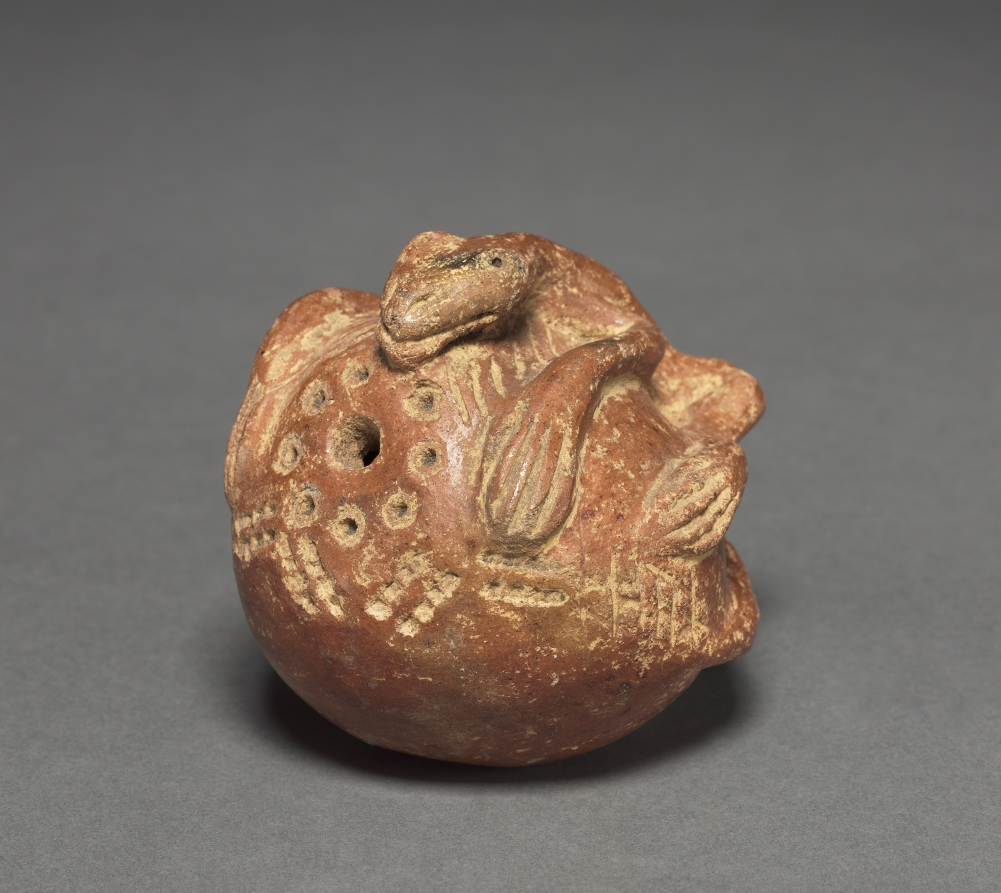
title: Chameleon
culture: Colombia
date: before 1921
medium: red ware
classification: Ceramic